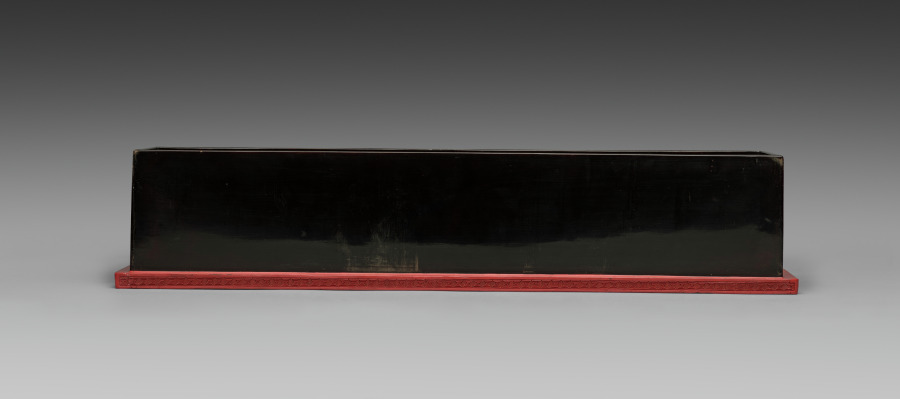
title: Base for a Carved Lacquer Scroll Box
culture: China, Qing dynasty (1644–1911), Qianlong reign (1736–95)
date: 1736–95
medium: cinnabar carved lacquer on wood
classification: Lacquer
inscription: 心寫治平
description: The elaborate design, superior craftsmanship, and inscription carved into the red cinnabar lacquer proclaim the imperial pedigree of this scroll box. On either end appears a five-clawed dragon, a design reserved only for an emperor. More dragons twist and wind through swirling clouds and waves along the length of the box’s sides and top. The carving is intricate and vigorous, while the design is controlled and regular. This box originally housed the handscroll, CMA 1969.31, private portraits of the Emperor Qianlong, his empress, and 11 other favorites among his presumed 40 or more wives during his 60-year reign.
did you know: This is the original box for the handscroll Portraits of the Qianlong Emperor and His Twelve Consorts, CMA 1969.31.